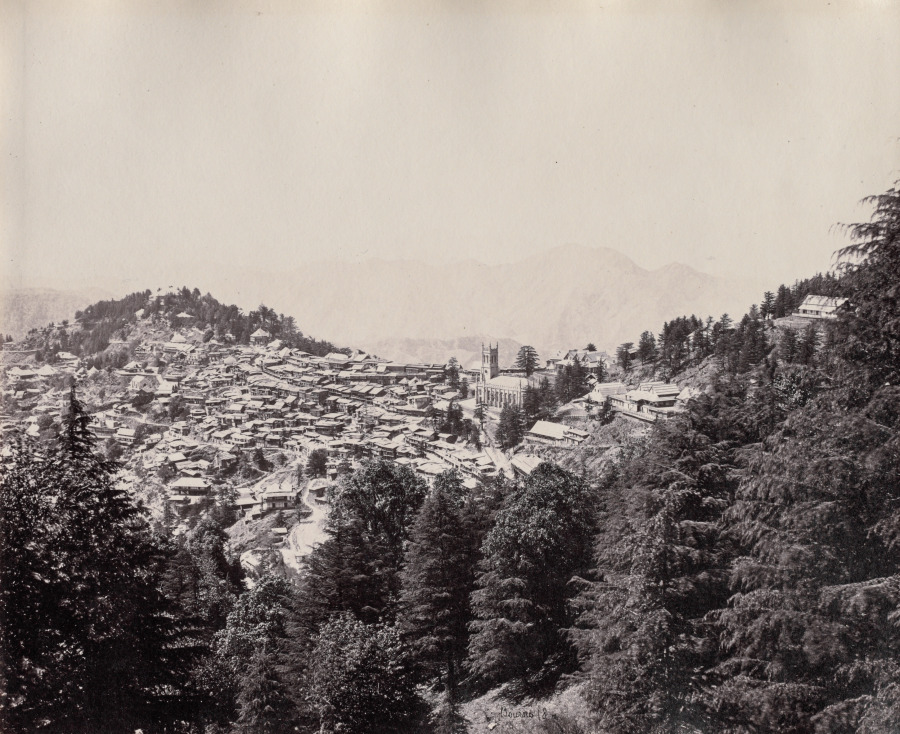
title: Shimla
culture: Britain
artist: Samuel Bourne (British, 1834–1912)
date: c. 1860s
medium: albumen print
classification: Photograph